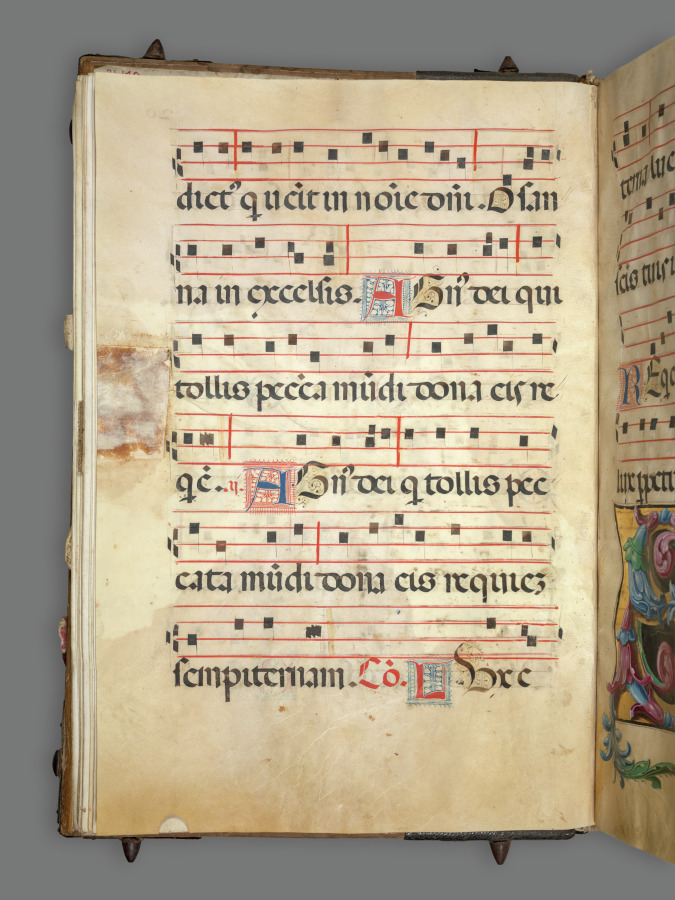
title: Gradual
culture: Italy, Verona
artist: circle of Girolamo dai Libri (Italian, 1474–1555)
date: c. 1520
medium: ink, tempera, and gold on parchment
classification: Manuscript